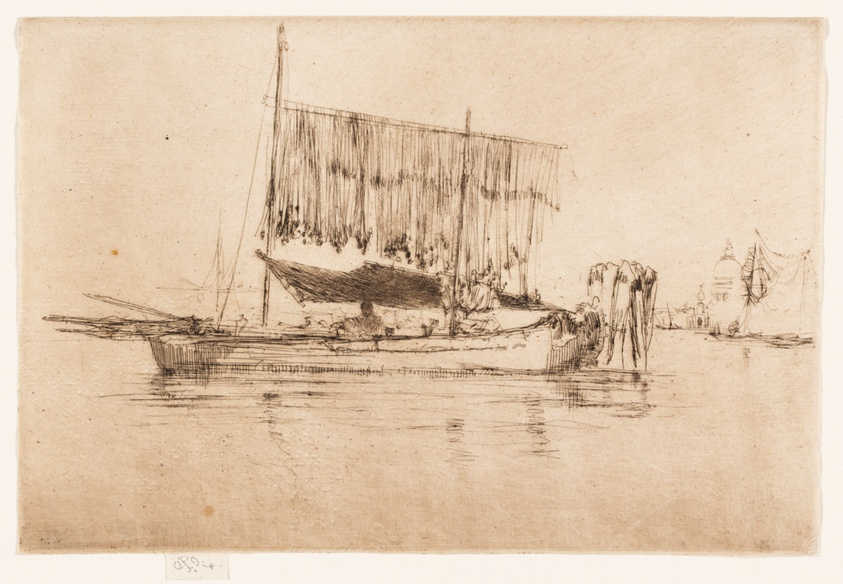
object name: Print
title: The Fishing Boat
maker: James McNeill Whistler (American, 1834-1903)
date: 1879/80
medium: Etching and drypoint with foul biting in dark brown ink on ivory laid paper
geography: United States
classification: etching; foul biting; print; prints and drawing; drypoint; paper